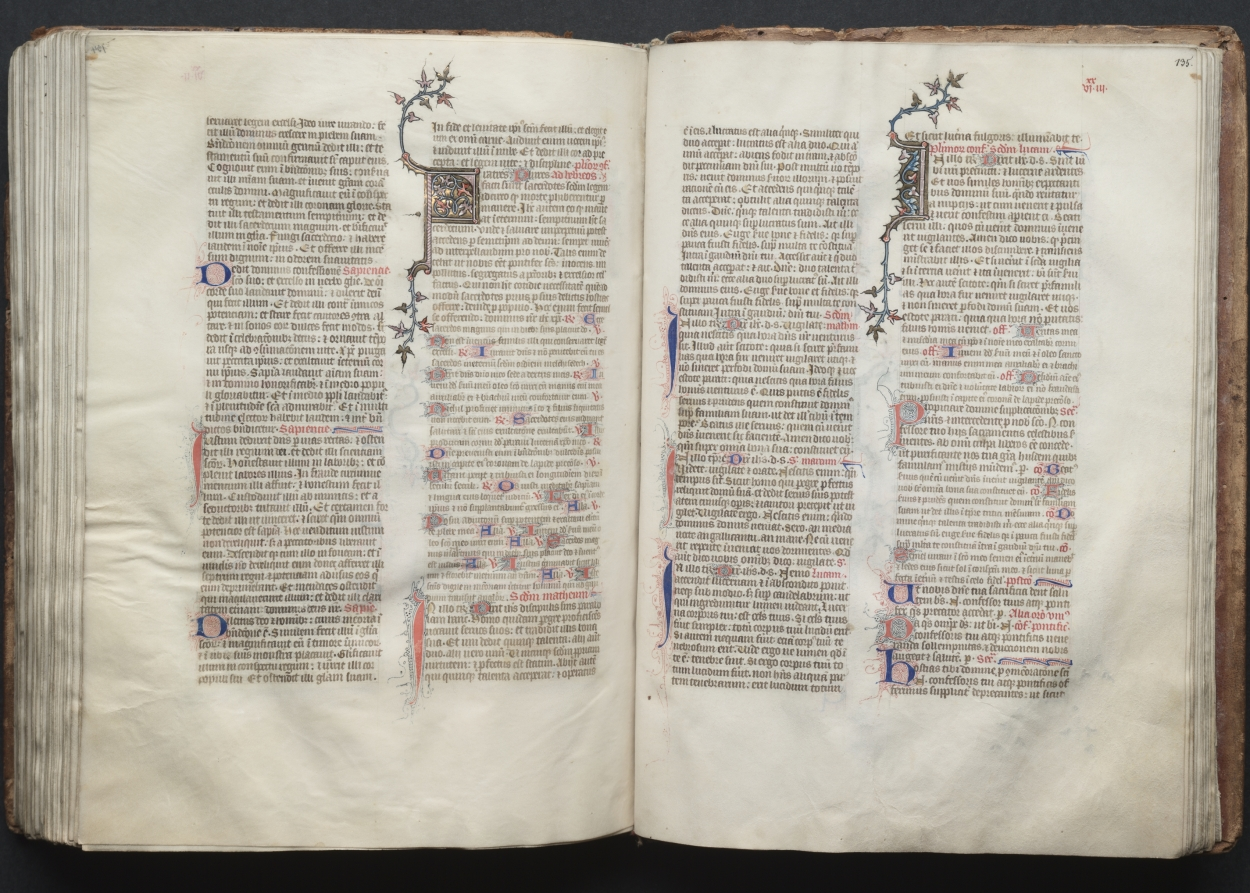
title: The Gotha Missal: Fol. 135r, Text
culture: France, Paris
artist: Master of the Boqueteaux (French)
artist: and Workshop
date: c. 1375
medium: ink, tempera, and gold on vellum; blind-tooled leather binding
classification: Bound Volume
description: The style and quality of this manuscript's decoration is typical of deluxe Parisian books made for aristocratic or royal patrons. Most of the book's decoration appears to be the work of the Master of the Boqueteaux, an artist active at the court of King Charles V (died 1380). His style was apparently shared by a number of book illuminators working in and around Paris. It is very possible that the Gotha Missal belonged to Charles V, but is not provable because the manuscript has no royal portraits and lacks a colophon. Given the book's magnificent decoration, however, it would seem that it was produced for a Valois prince, if not for the king himself. The manuscript receives its name from the German dukes of Gotha, its later owners.